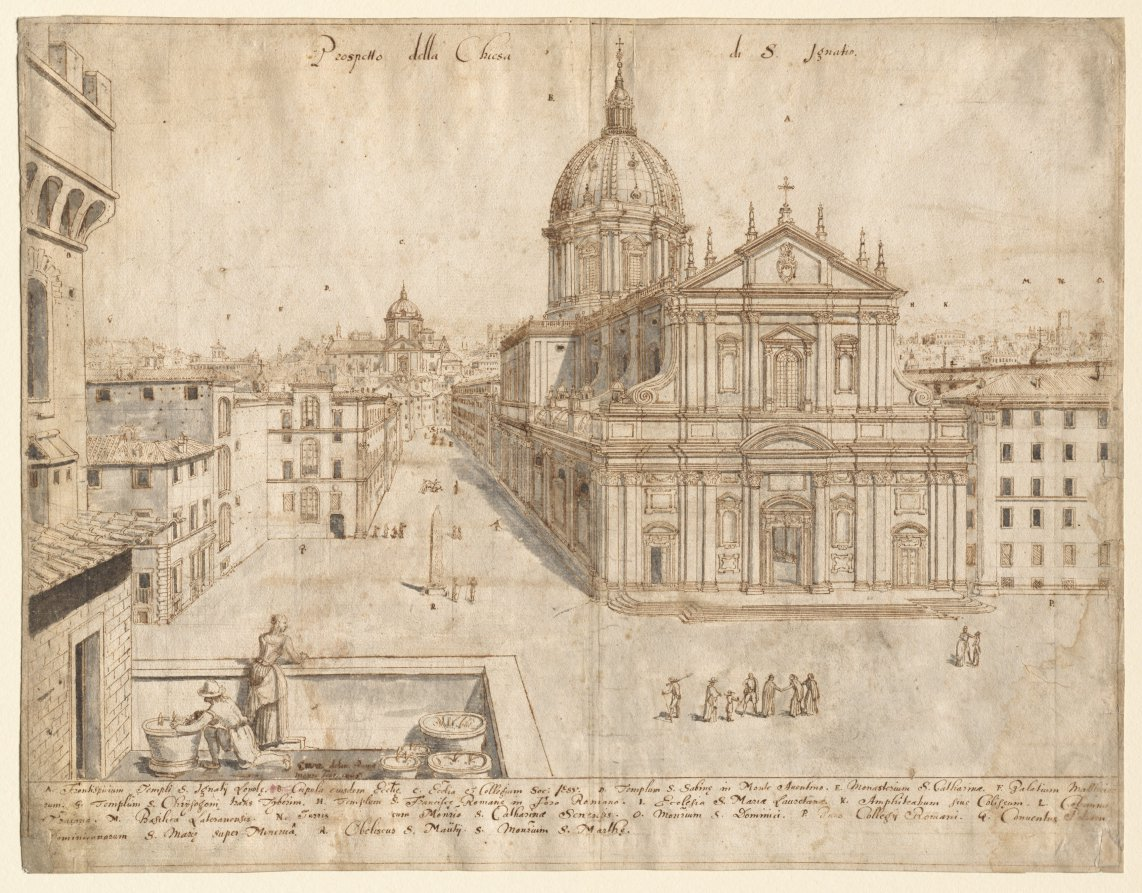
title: Eighteen Views of Rome: The Church of Sant'Ignazio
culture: Flanders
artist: Lievin Cruyl (Flemish, c. 1640-c. 1720)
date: 1665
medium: pen and brown ink and brush and gray wash over graphite; framing lines in brown ink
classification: Drawing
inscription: signed, lower left, in brown ink: [artist's monogram: LC] RVYL delin. Romæ / mense Febr. 1665 ; by artist, upper center, in brown ink: Prospetto della Chiesa di S. Ignazio ; by artist, throughout composition, in brown ink: [the letters A-S] ; by artist, across bottom, in brown ink: A. Frontispicium Templi S. Ignatij Loyolæ. B. Cupula eiusdem Eccliæ. C. Ecclia et Collegium Soc: Jesu. D. Templum S. Sabinæ in Monte Aventino. E. Monasterium S. Catherinæ. F. Palatium Mattheio= / rum. G. Templum S. Chrijsogoni trans Tyberim. H. Templum S. Franciscæ Romanæ in Foro Romano. I. Ecceslia S. Mariæ Lauretanæ. K. Amphiteatrum sive Colisseum. L. Colonna / Traiana. M. Basilica Lateranensis. N. Turris cum Monrio. S. Catherinæ Senensis. O. Monrium S. Dominici. P. Pars Collegij Romani. Q. Conventus Patrium / Dominicorium S. Mariæ super Minervâ. R. Obeliscus S. Maürtij. S. Monrium S. Marthæ. ; VERSO, upper left, in brown ink [S45..?][masked] ; upper left, in graphite: n. 545 ; ON STRIPS OF PAPER MOUNTED TO VERSO, lower right, in graphite: A20978 ; lower right, in graphite: E. 12